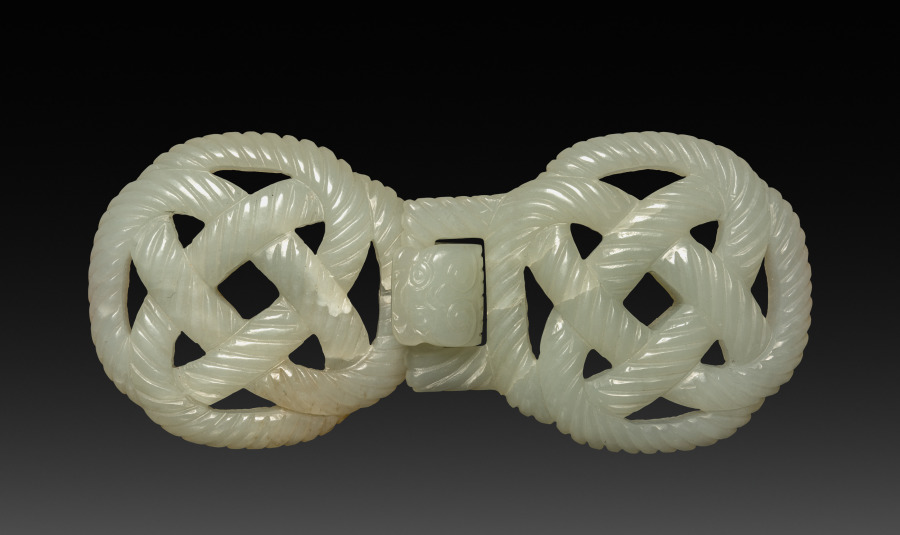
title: Buckle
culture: China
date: 1900s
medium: jade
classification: Jewelry